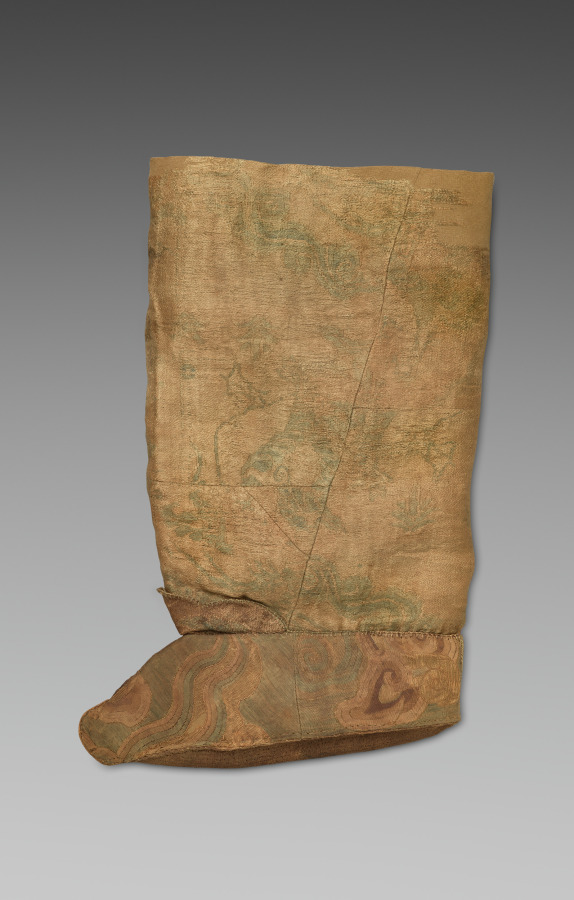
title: Pair of Boots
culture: China, Northern, Liao dynasty (907-1125)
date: 1000–1125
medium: Silk: compound twill; silk and gold: tapestry; silk: tabby, gauze, and batting; leather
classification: Garment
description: The fabric and tailoring of garments have always defined social status. For these boots, different outer fabrics were used: a patterned silk for the leg portion, and tapestry (kesi) for the foot. Since both were considered luxury fabrics, they were pieced together from remnants too precious to discard. Consequently, the silk pattern was not used in relation to the form of the boot, as seen in some other imperial boots. By contrast, these boots would have been made for a court official, not a member of the imperial family. The patterned silk was woven with geese flanking a vase of flowers on a stand and surrounded by cloud scrolls. The Chinese motif of flowers arranged in a vase was adopted by the Liao during the 11th century and indicates an 11th- or early 12th-century date for the boots.